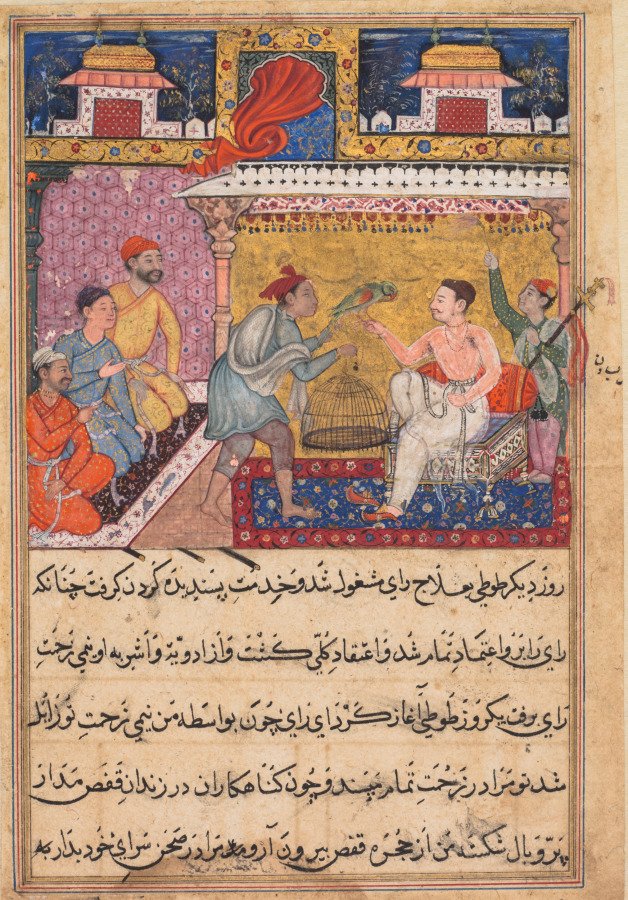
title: The hunter offers the mother parrot to the king of Kamarupa, from a Tuti-nama (Tales of a Parrot): Fifth Night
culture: Mughal India, court of Akbar (reigned 1556–1605)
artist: Basavana (Indian, active c. 1560–1600)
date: c. 1560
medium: gum tempera, ink, and gold on paper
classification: Painting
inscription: 'amal basāwan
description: The king of Kamarupa, which ironically means “body of erotic love,” had leprosy. The hunter brought the captured mother parrot to the king, assuring him that the bird knew a cure. The lavish use of gold indicates that this book was a costly production. The figure of the hunter reveals the talents of the artist Basavana, whose name is written in the right margin. Draped in rustic garments shaded to appear softly flowing, the hunter bends forward with a subtle look of shrewd expectancy as the king seems ready to pay a high price for the parrot. The billowing red curtain is one of Basavana’s signature motifs. Beyond is a tantalizing glimpse of the forest to which the parrot will soon escape to rejoin her children.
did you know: This leper king ruled a territory that stretched from Bhutan to Assam and Bengal.